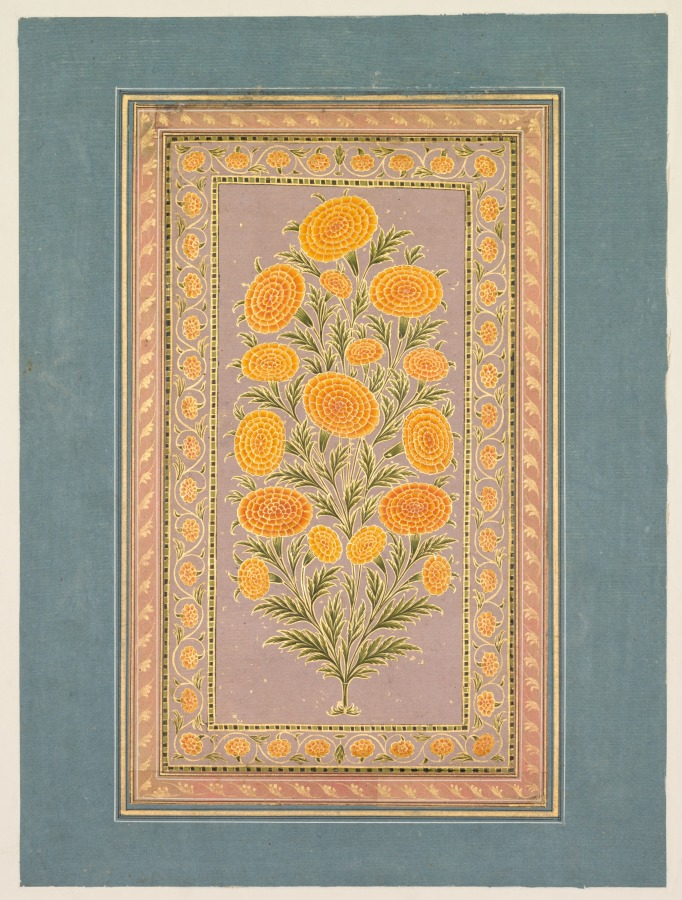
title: Flowering Marigold (verso)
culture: India, Murshidabad or Lucknow, Mughal, 18th century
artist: style of Hunhar II (Indian, active mid-1700s)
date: c. 1765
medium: Gum tempera and gold on paper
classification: Painting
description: Trade with the Portuguese, which flourished through the 1500s to 1600s, brought many new plants to India from their territories in South America. Examples include potatoes, tomatoes, and marigolds, all of which became staples of Indian daily life. Because of their beautifully vibrant color, marigolds were made into flower garlands and continue to be much used in devotional offerings throughout India.